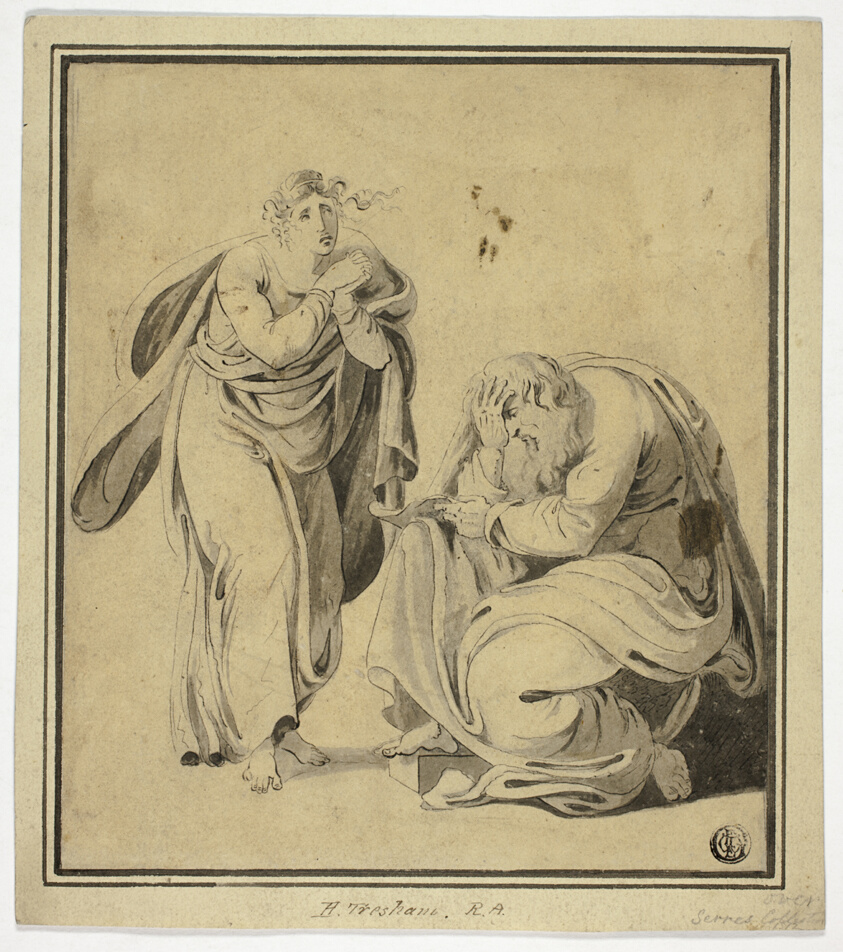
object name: Drawing and Watercolor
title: Man and Woman in Attitudes of Distress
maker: Henry Tresham or after; Irish, 1751-1814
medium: Pen and black ink and brush and gray wash on cream laid paper, laid down on cream wove paper, laid down on blue laid paper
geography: Ireland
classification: pen and ink drawings; paper; brush and wash; drawings (visual works); prints and drawing